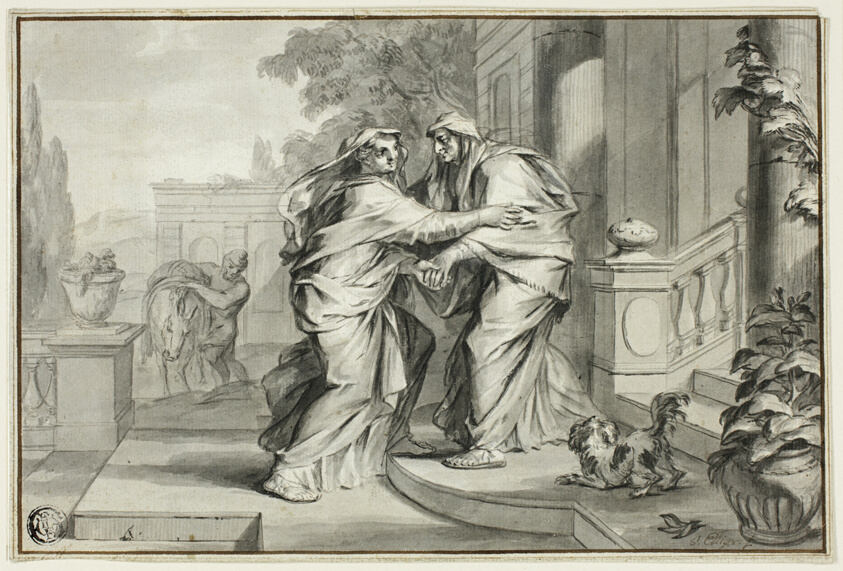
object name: Drawing and Watercolor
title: The Visitation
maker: Ottmar Elliger, the younger (German, 1666-1735)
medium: Pen and gray ink and brush and gray wash on ivory laid paper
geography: Germany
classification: ink or chalk wash; drawings (visual works); prints and drawing